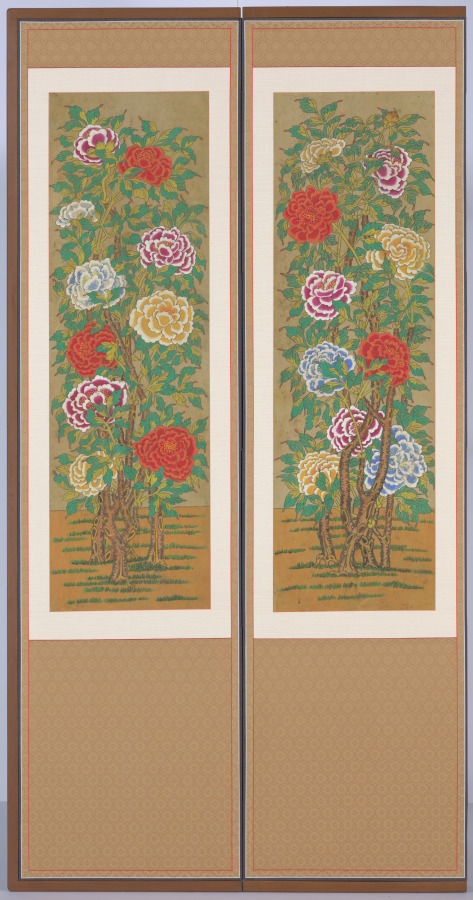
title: Peonies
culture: Korea, Joseon dynasty (1392−1910) or Japanese colonial period (1910−1945)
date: early 1900s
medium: Eight-panel folding screen; ink and color on silk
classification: Painting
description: By the late nineteenth century, peony paintings with bold designs and striking graphic stylization were increasingly produced and consumed by middle-class members because of its symbolic meaning: prosperity and wealth. This early 20th-century folding screen of peonies may have used for festive occasions such as weddings.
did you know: This early 20th-century folding screen has both sides painted with the image of bloomed peonies.